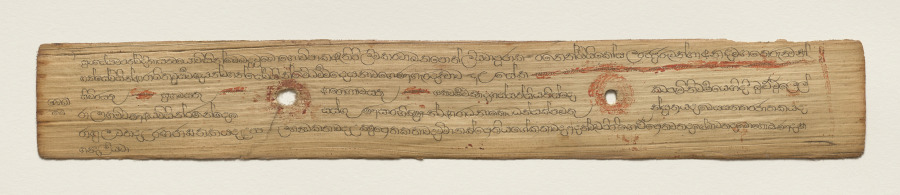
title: Leaf from a Buddhist Manuscript (recto)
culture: Sri Lanka, Singhalese, Late 17th century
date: c. 1700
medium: fiber paper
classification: Manuscript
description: Palm leaf material is still used for manuscripts in Sri Lanka. The palm leaves are prepared first by boiling them, drying them in the sun, and then rubbing them with oils. Scribes then use a metal stylus to incise the text. Then charcoal powder is wiped across the pages, filling in only the inscribed lines.